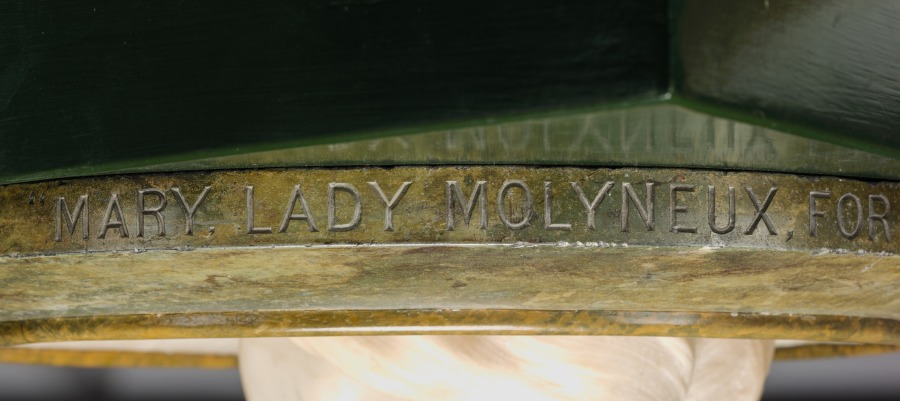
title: Mary, Lady Molyneux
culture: England, 19th century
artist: Alexander Munro (British, 1825–1871)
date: 1868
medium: marble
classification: Sculpture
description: Munro's method of portraying Lady Molyneux, with her head placed squarely in the center of a circle and her hair radiating outward from her face, gives the image an unusual emotional intensity that is probably the result of focusing relentlessly on the particular character of her features.